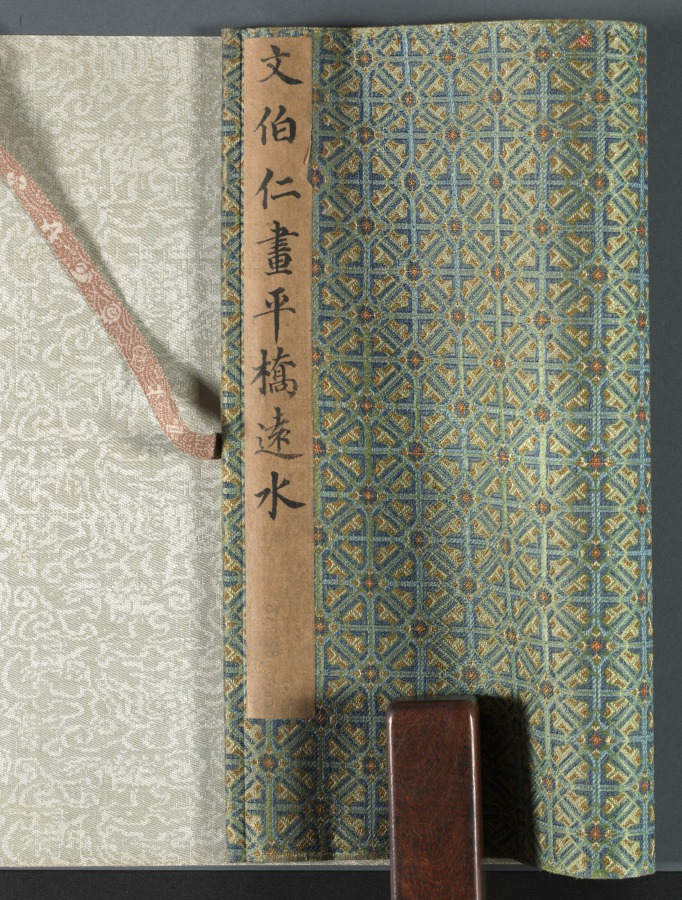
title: Water Village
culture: China, Ming dynasty (1368–1644)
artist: Wen Boren (Chinese, 1502–1575)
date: 1570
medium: handscroll; ink and light color on paper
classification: Painting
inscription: 隆慶庚午秋仿趙文敏筆. 五峰文伯仁 [印] 五峰山人; 文伯仁印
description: In the autumn of 1570, Wen Boren painted this seemingly unemotional scene of low-lying marshlands with a chain of rounded mountains in the background. A fishing boat is nestled on the shore near the village. Although paths and bridges traverse the landscape, only two people are visible in the stillness. From the restrained atmosphere of this landscape, one would never guess that Wen Boren was known as the “bad boy” of the Wu School for his explosive temper. As a younger man, he was even embroiled in a contentious lawsuit with his own uncle, Wen Zhengming (1470–1559), a master of Ming dynasty painting with whom he had trained. The ideal of the scholar-painter, or literati, was that an artist’s moral character is reflected in his paintings, so there was great incongruity between Wen Boren’s difficult personality and his restrained landscapes. A contemporary, Wang Shizhen, wrote this about him: "This gentleman is prone to behave odiously and screamed accusations at people. How is it possible for him to carry in his bosom such a wealth of scenic wonders?" Who knows what effort it took to subdue his fractious spirit to project an image of coolness and refined taste in his paintings?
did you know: A foreground tree has an eccentric twisting silhouette and pepper-dot "halo" of leaves.